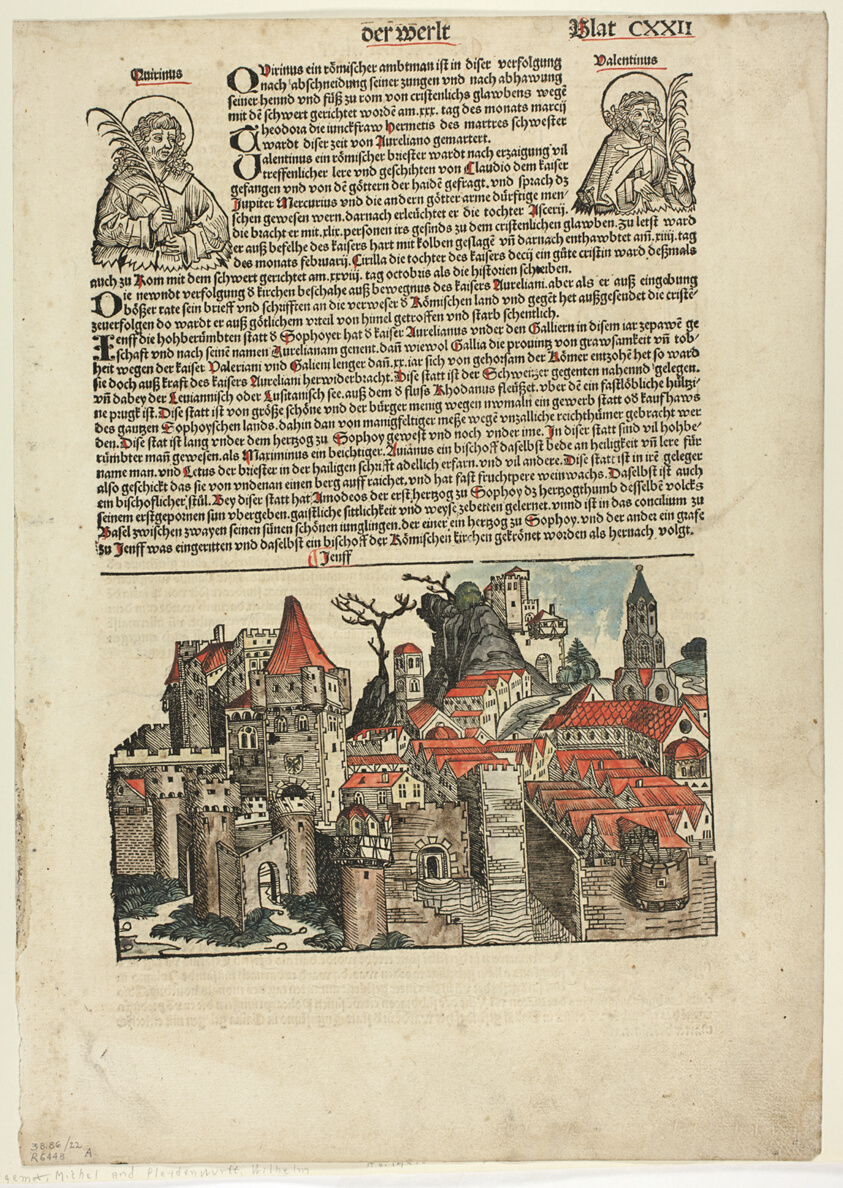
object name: Print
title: Geneva from Schedel Weltchronik (Schedel’s World History), Plate 22 from Woodcuts from Books of the 15th Century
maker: Michel Wolgemut (German, 1434/37–1519) and Wilhelm Pleydenwurff (German, c. 1460–1494); printed and published by Anton Koberger (German, c. 1440/45–1513); original text by Hartmann Schedel (German, 1440–1514); portfolio text by Wilhelm Ludwig Schreiber (German, 1855–1932)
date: 1493, portfolio assembled 1929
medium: Woodcut in black with hand-colored additions, and letterpress in black with rubrication (recto and verso), on buff laid paper, tipped onto cream wove paper mat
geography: Germany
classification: woodcut; print; prints and drawing